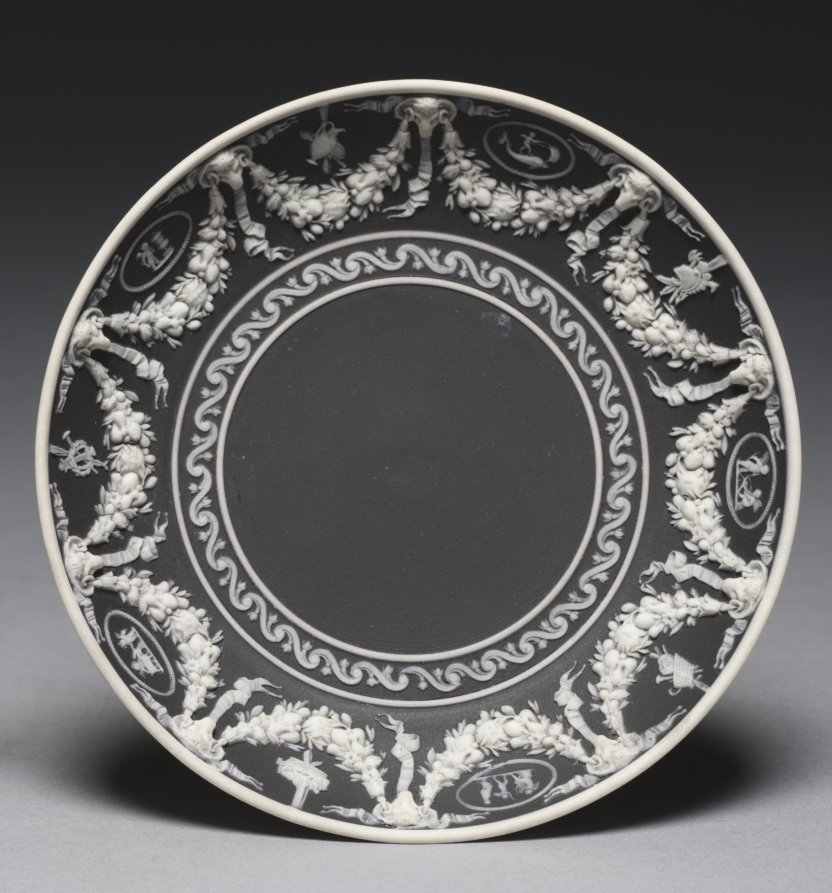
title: Saucer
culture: England, Staffordshire, 18th century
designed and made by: Wedgwood Factory (British)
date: c. 1790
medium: jasper ware with relief decoration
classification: Ceramic